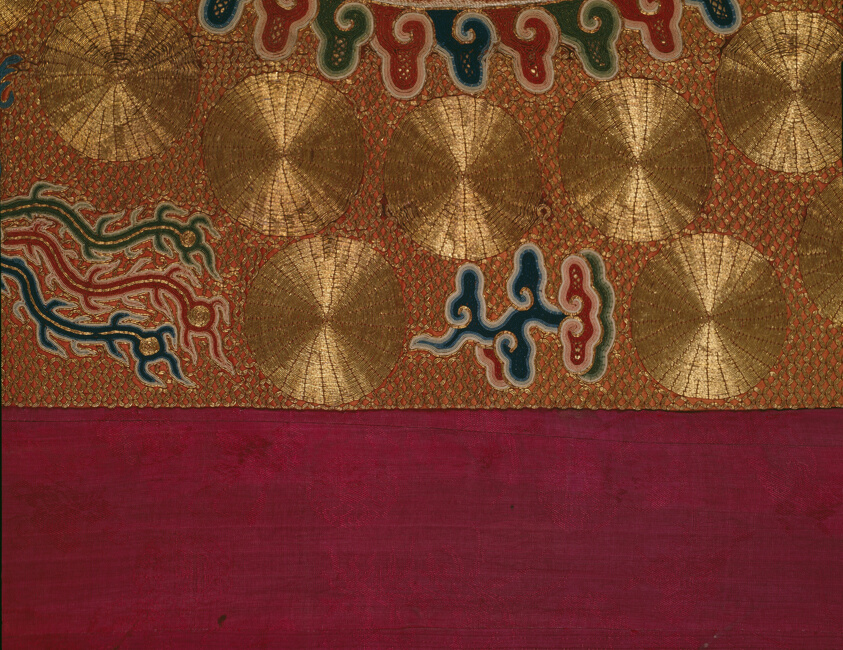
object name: Costume and Accessories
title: Vestment (For a Second-degree Taoist Priest)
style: qing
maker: Han-Chinese (China)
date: Qing dynasty (1644–1911), 1801/50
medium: Silk, warp-float faced 3:1 'S' twill weave self-patterned by areas of plain weave; edge bands and center back: silk, warp-float faced 7:1 satin weave; embroidered with silk, gold-leaf-over-lacquered paper, and gold-leaf-over-lacquered-paper-strip-wrapped silk in satin and knot stitches; laid work and couching; inner collar and closures: silk, weft-float faced 1:7 satin weave; collar patches: silk, warp-float faced 7:1 satin weave; lined with ramie, plain weave; lining fragments: silk, warp-float faced 4:1 satin weave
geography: China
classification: textile; needlework (visual works); weaving; costume